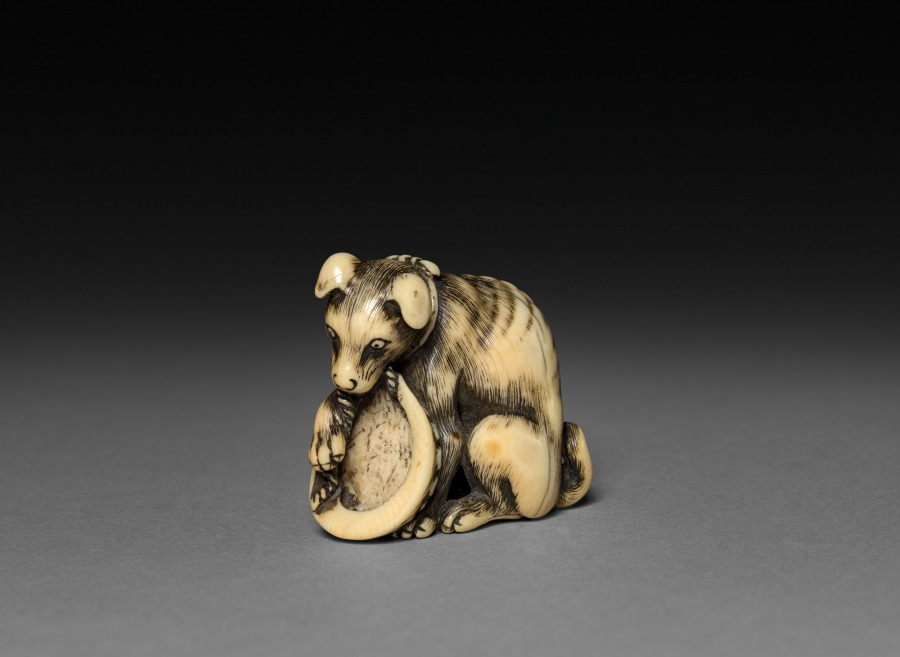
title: Dog with Shell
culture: Japan, Edo period (1615–1868)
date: 1700s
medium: ivory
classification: Netsuke